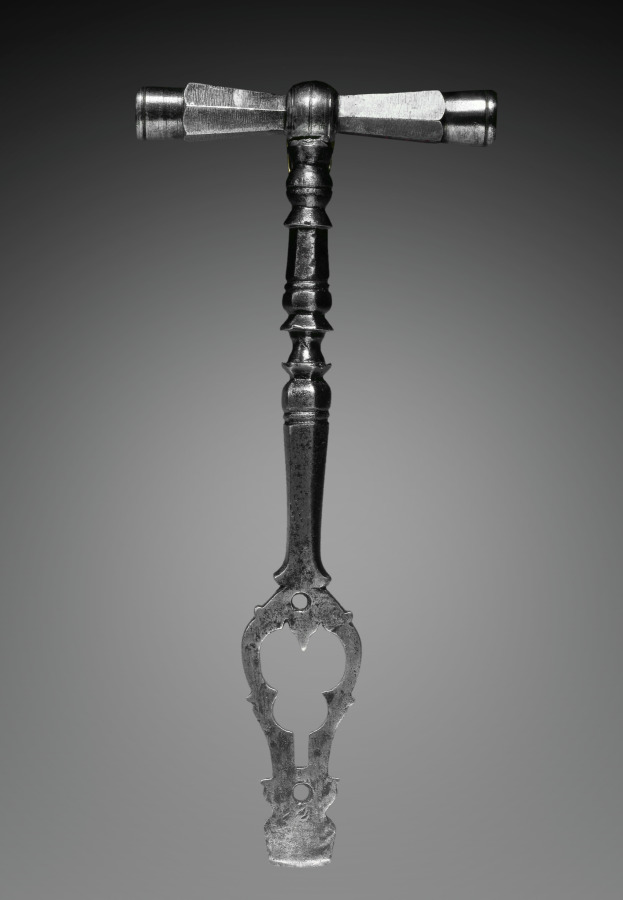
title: Spanner for a Wheel-Lock Gun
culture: Germany, early 17th century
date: c. 1600–1625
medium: steel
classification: Arms and Armor